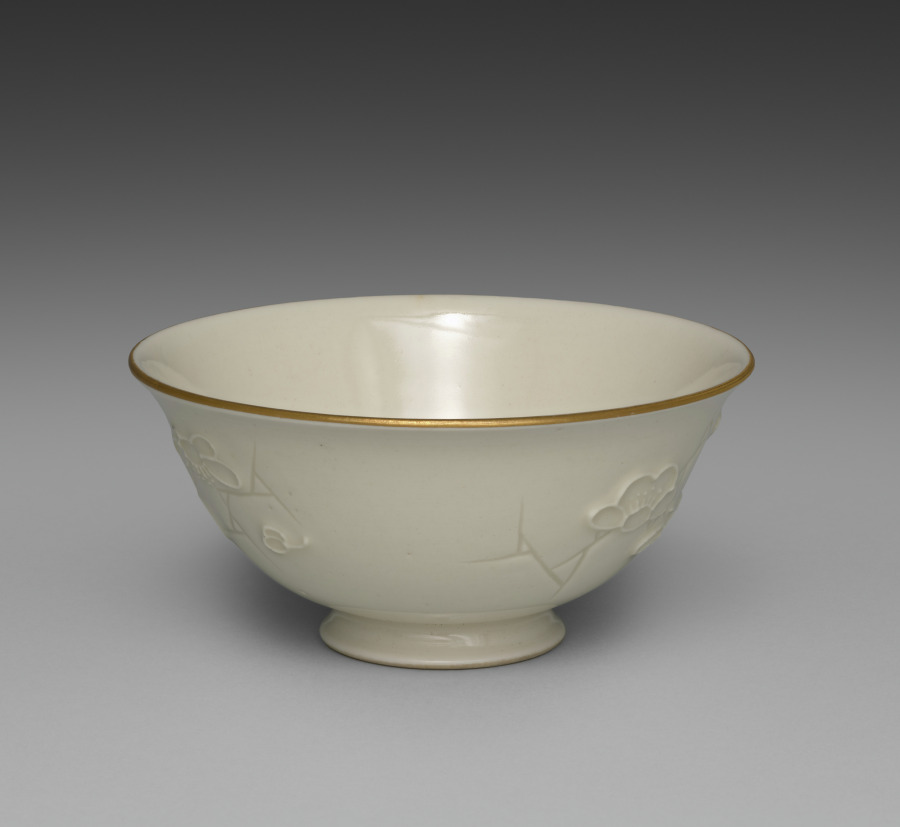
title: Bowl from Dining Set with Plum Blossoms and Cracked-Ice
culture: Japan, Meiji period (1868–1912)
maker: Seifū Yohei II (Japanese, 1844–1878)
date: c. 1875–78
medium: Porcelain with molded designs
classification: Ceramic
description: Each item in this set has a delicate low-relief design of flowering plum branches over scattered, intersecting lines meant to resemble the cracked-ice surface of a frozen body of water and is signed on the base in gold pigment. While Yohei II produced many fine works in underglaze blue, like those produced by Kiyomizu Shichibei, he also made works in quite different styles later in his career, from the early 1870 s. In 1873, he was appointed purveyor to the Industrial Center of Kyoto Prefecture, a designation associated with Kyoto’s efforts to reach an international market through the port of Kobe; and from 1875 until his death, he was involved in national-level projects to present Japanese ceramics across the world. It was during this period that Yohei III was apprenticed to Yohei II, and it has been suggested that this set may in fact be an early example of Yohei III’s work, which he signed with his teacher’s name. Decorated with flowers resembling Japanese textile motifs, the set calls to mind the design of Yohei II’s pair of vases with plum blossoms in the Victoria and Albert Museum. Here, the elaborate trees created for a formal public exhibition setting have been translated into the approachable blossoms of the genteel domestic environment. While the designs are consistent across the pieces, each raised flower petal and pistil and each incised line in the ice was done by hand, so the cups, bowls, and dishes are similar yet unique. The bottoms of two boxes once identified the set’s owner, but the information has been deliberately obscured with black ink. However, inscriptions still visible appear to indicate two occasions, once at the end of July 1886 , and once again in June 1916 , when parts of the set were requested from Hokura in Niigata Prefecture. The location corresponds to a neighborhood in the present-day city of Jōetsu. The surname Tsuji 辻 also appears on a paper tag affixed to one of the box cloths. Future research may possibly reveal more about their provenance. A vase by Yohei III in a private collection combines the formal grandeur of the Yohei II vases in the Victoria and Albert Museum with the gentler design of this dining set, placing flowering plum trees against soft, scalloped-edge clouds resembling those in golden screens.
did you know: The dining wares have a creamy white coloration that the four boxes containing them identify as Korean in style.